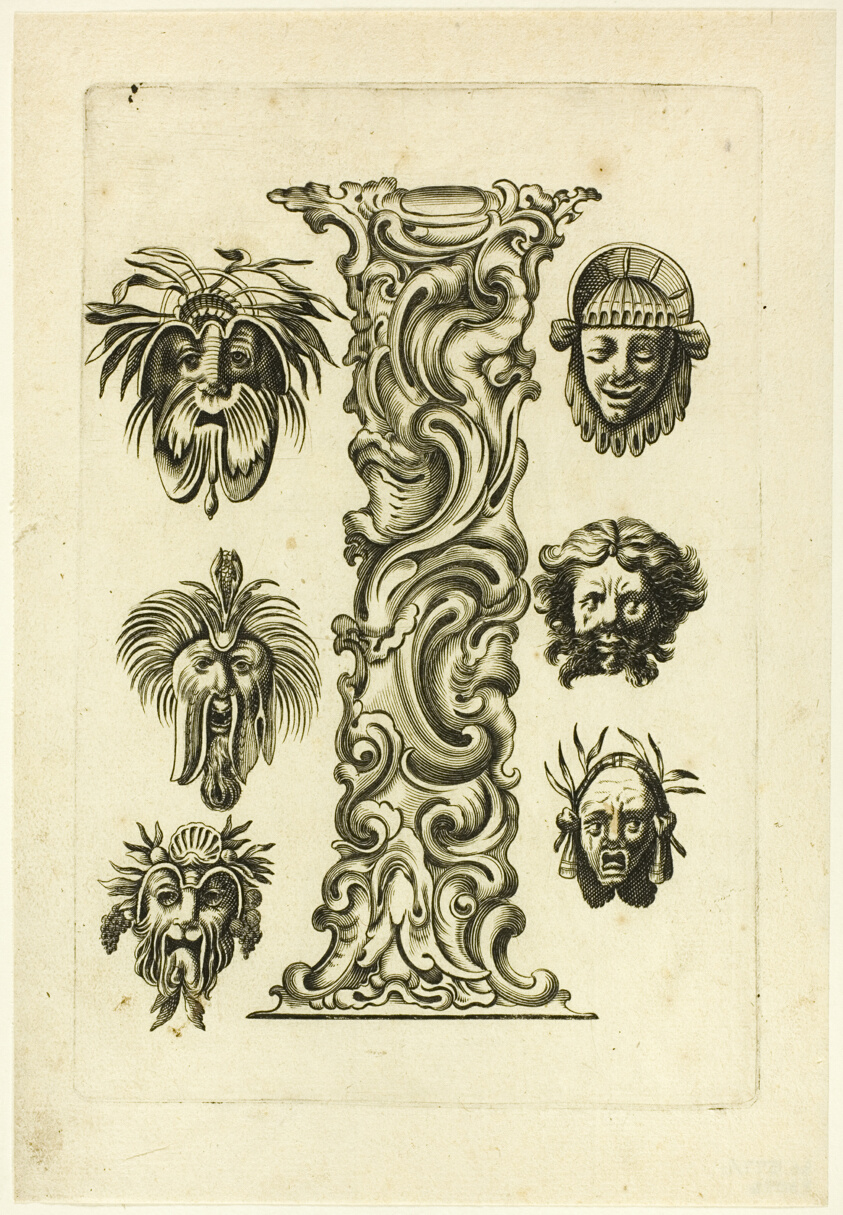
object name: Print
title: Letter I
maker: Peter Aubry (German, 1596-1668)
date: 1630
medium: Engraving on paper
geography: Germany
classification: engraving; print; prints and drawing